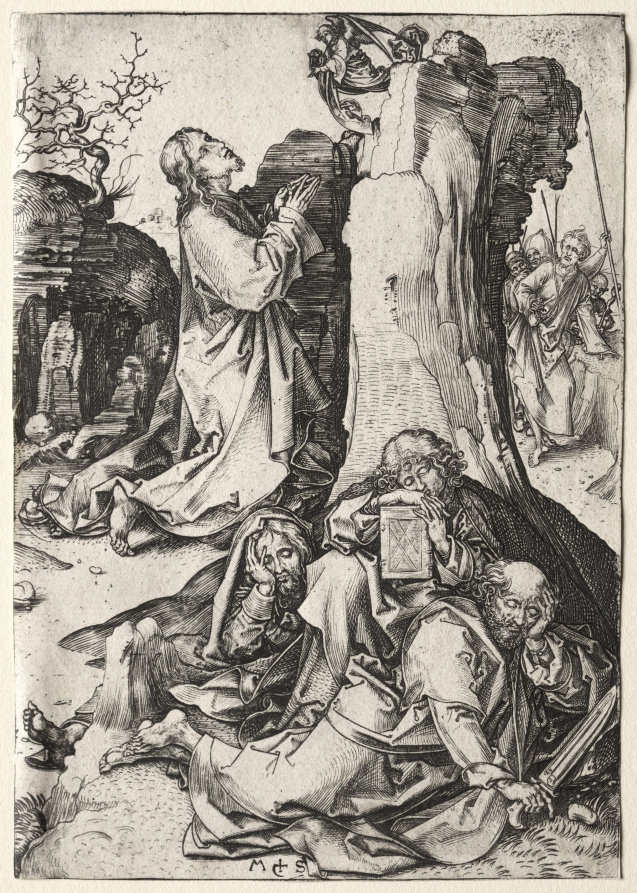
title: The Passion: The Agony in the Garden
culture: Germany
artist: Martin Schongauer (German, c. 1450–1491)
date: c. 1480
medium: engraving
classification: Print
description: Martin Schongauer's series of the Passion of Christ was his largest set of engravings, made around 1480, and extensively copied across Europe. It consists of twelve prints detailing the suffering of Christ in the last days of his life. Schongauer's version focuses on crowded scenes, grotesque physiognomies of Christ's tormentors, and great pathos in the compositions. Here, Jesus kneels in prayer in the Garden of Olives and looks up at a hovering angels. The apostles Peter, James, and John are sleeping in the foreground. In the background, Judas holds the bag of money received in exchange for his betrayal as he leads Roman soldiers towards Christ.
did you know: Martin Schongauer achieved great effects of depth and tonal variation in the rendering of the central rock formation, which mimics the posture of Christ.